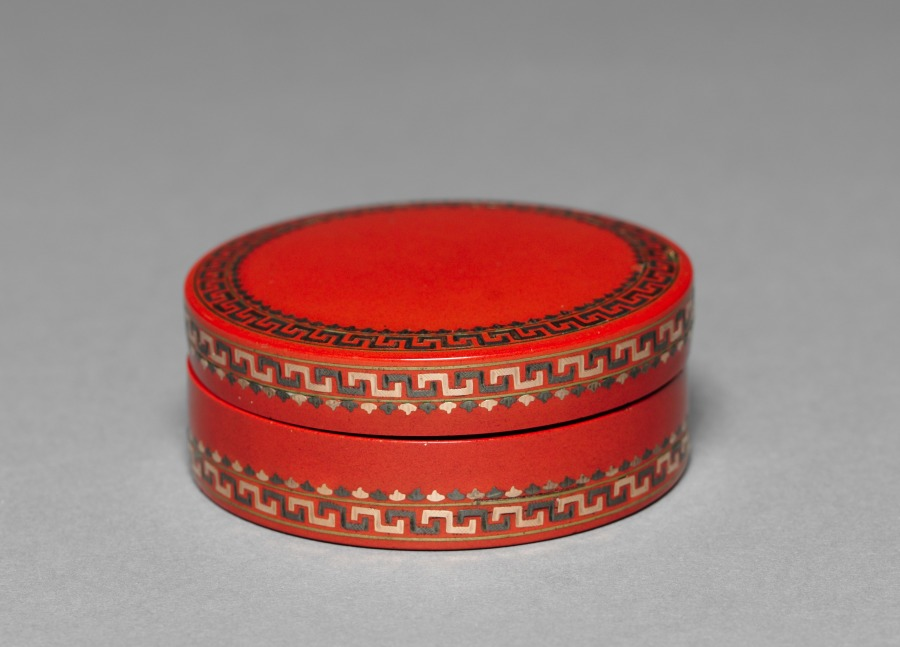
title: Round Box with Lid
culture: France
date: c. 1760–70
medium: tortoiseshell decorated in red lacquer with inlays of gold, silver, and brass wire; contains a portrait miniature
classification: Miscellaneous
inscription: miniature inscribed: annee [?]/1767.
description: This small lacquer box, made in France during the 1700s, references China in that it imitates Chinese material and craftmanship such as red lacquer and celadon. This round box with an inlaid key pattern (an interlocking geometric motif ), emulates the bright vermilion color of Chinese red lacquer, typical of Suzhou lacquer ware. The key pattern is reminiscent of the so-called Chinese thunder pattern (leiwen).